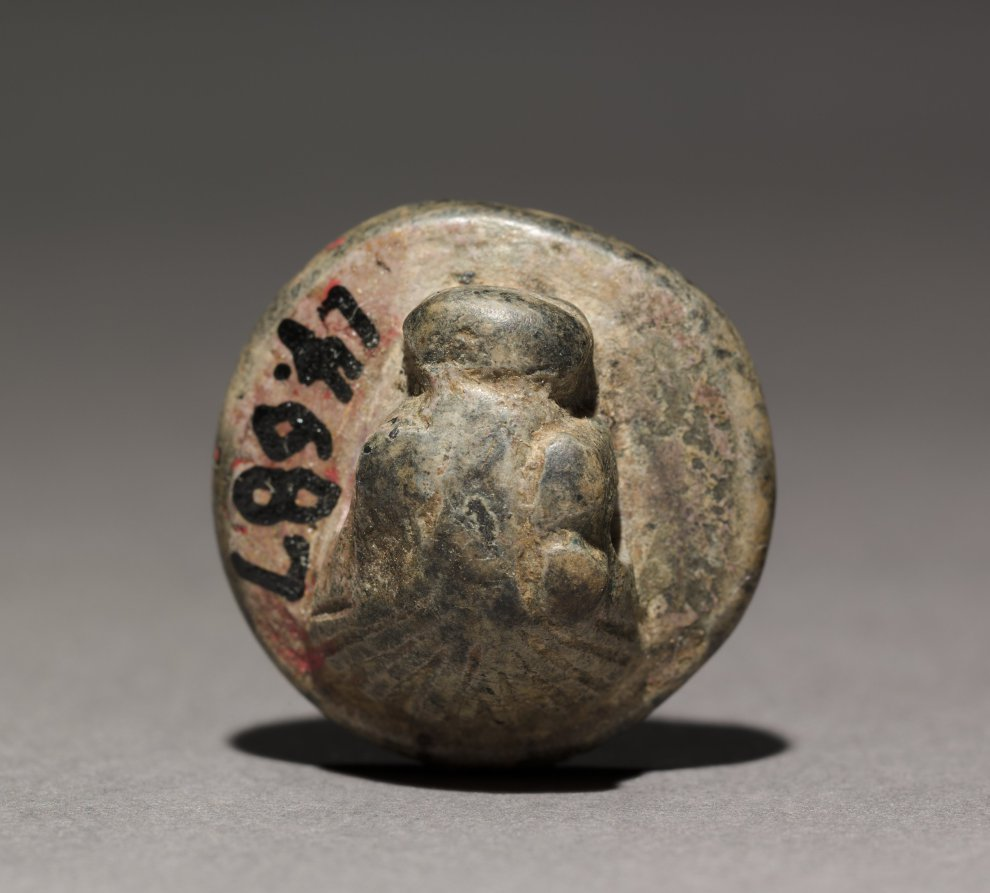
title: Seal Amulet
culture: Egypt, Old Kingdom (2647–2124 BCE), Dynasty 6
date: 2311–2140 BCE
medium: glazed steatite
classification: Amulets